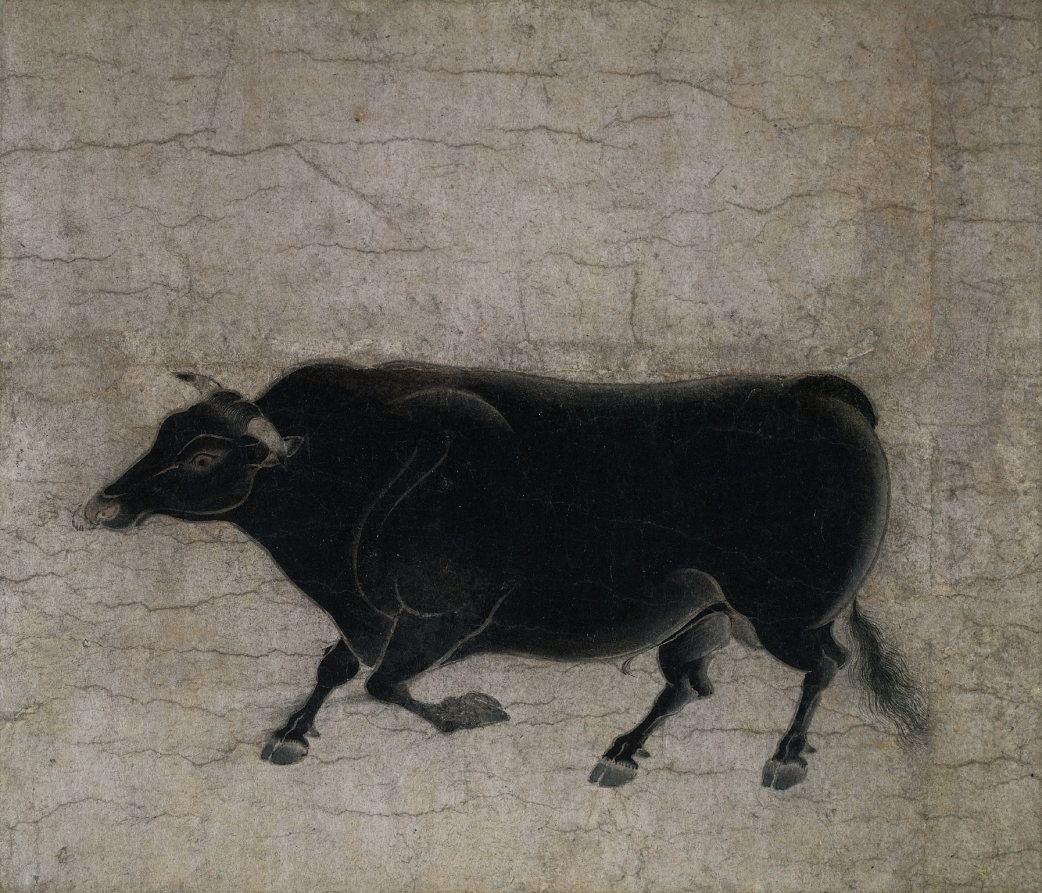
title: Swift Bull from the Ten Swift Bulls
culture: Japan, Kamakura period (1185–1333)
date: late 1200s–early 1300s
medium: section of a handscroll mounted as a hanging scroll; ink and slight color on paper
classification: Painting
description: Across the world, animals once played a much larger role in the transportation of the elite. Members of Japan’s imperial court traveled in vehicles pulled by oxen until the late 1400s, when oxcarts were restricted to ceremonial use. One sign of the past importance of the ox as a status symbol survives in this fragment from a scroll of portraits of 10 speedy bulls. The painter layered washes containing differing ratios of black ink to water to create a three-dimensional effect.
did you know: We know the original scroll had ten bulls because a copy of the complete scroll exists.